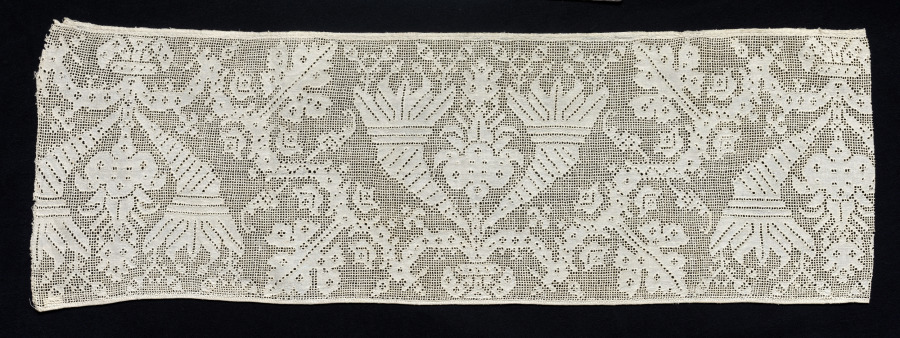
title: Lace Band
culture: Italy, Sicily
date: 1700s–1800s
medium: Linen: needle lace (drawnwork)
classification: Lace